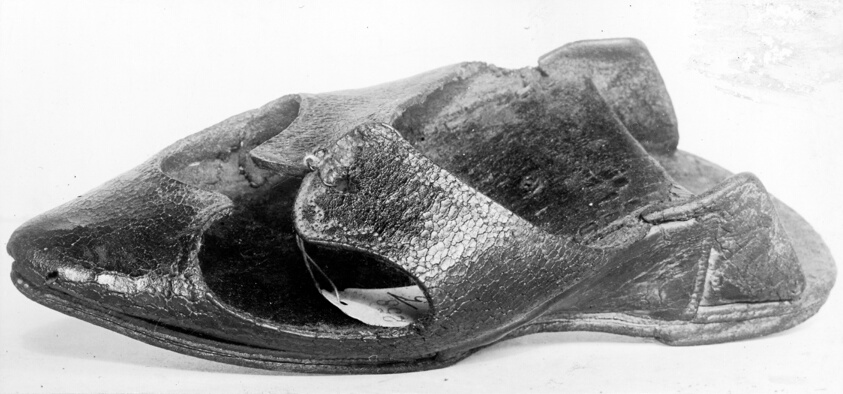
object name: Textile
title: Patten (Overshoe)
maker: England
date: 17th century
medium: Leather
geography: England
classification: textile; shoes - misc; costume accessory - shoe